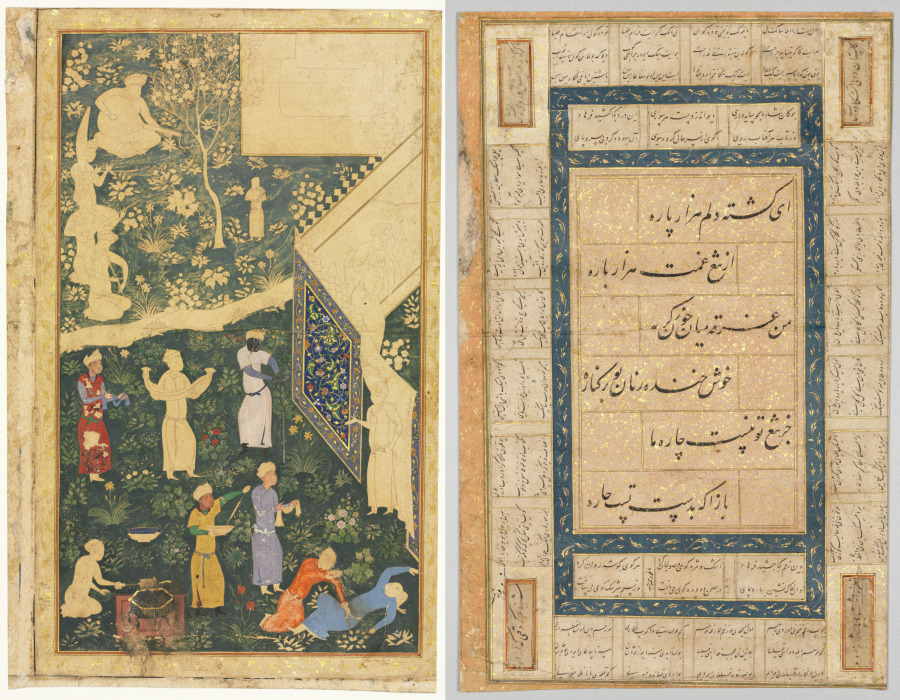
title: Left side of a double-page album folio: Outside a Royal Encampment (recto) and Calligraphy, Persian Verses (verso)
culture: Afghanistan or Iran, Timurid period (1370–1501)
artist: style of Bihzad (Iranian, active 1470–1506)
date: c. 1485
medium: opaque watercolor, ink, and gold on paper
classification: Manuscript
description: The painting is the left side of a double composition; at the upper left are musicians who provide ambient entertainment. A cook prepares meat over a brazier, while a servant brings kebab on a shallow bowl. The unfinished state of this painting reveals the artist's process of creating underdrawings that are filled with color. The verso has an example of calligraphy.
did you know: Intoxicated, a man in blue at the lower right has fallen.